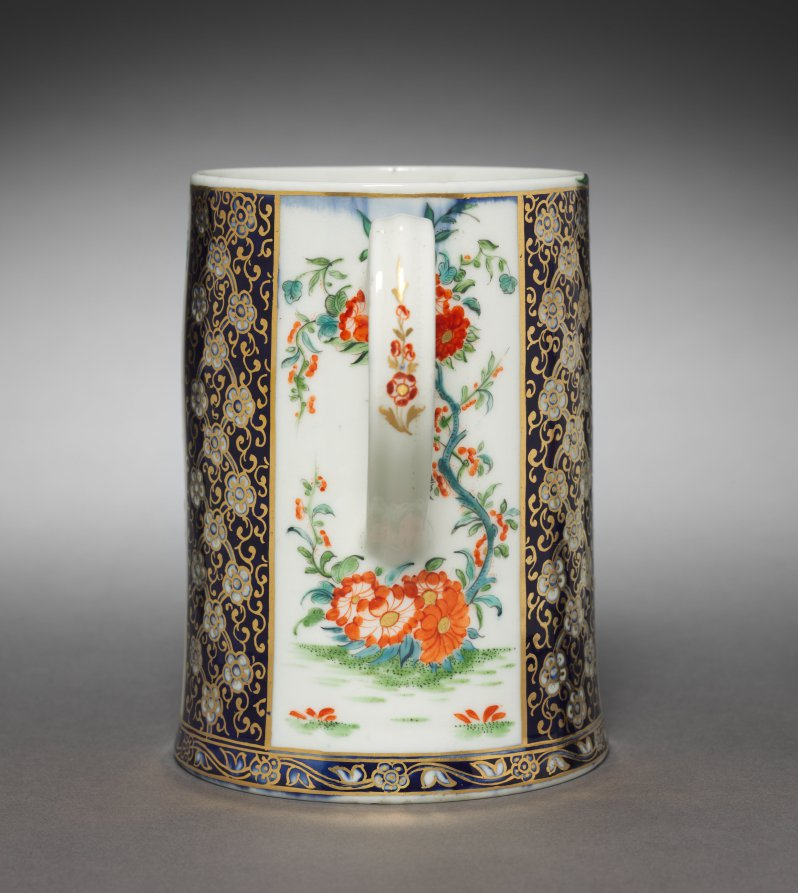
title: Cann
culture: England, 18th century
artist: Chelsea Porcelain Factory (Britain, London, 1745–84)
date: c. 1800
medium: porcelain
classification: Ceramic